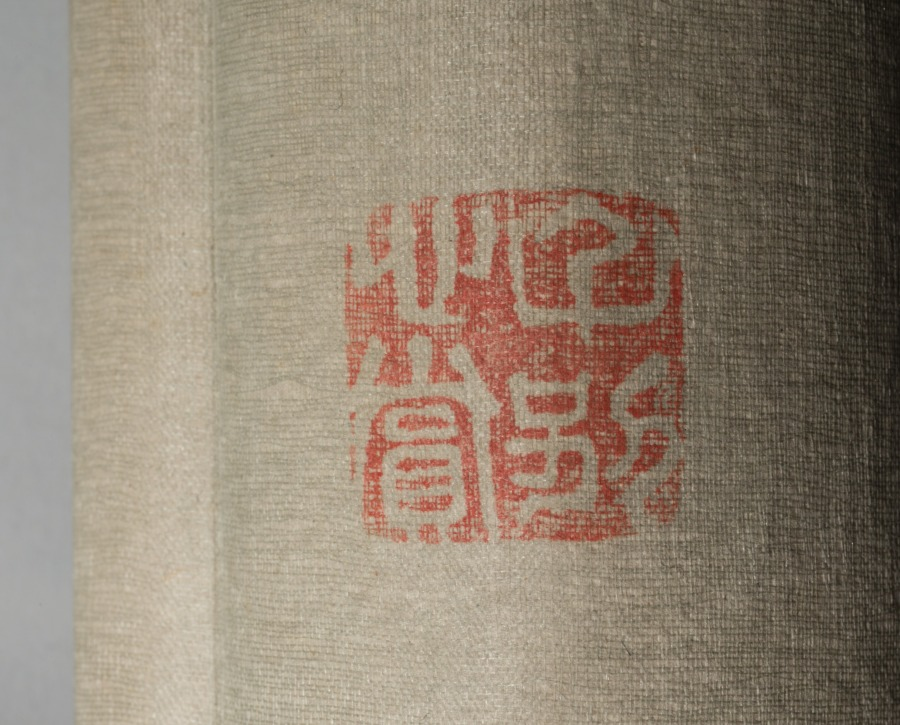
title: Courtesan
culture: Japan, Edo period (1615–1868)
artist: Matsuno Chikanobu (Japanese, active 1716–35)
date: 1716–35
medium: hanging scroll; ink and color on paper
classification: Painting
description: A glamorous courtesan sports an outer robe decorated with large roundels featuring plant motifs including iris and bush clover. Little is known about the life and artistic training of the painter Matsuno Chikanobu, an ukiyo-e artist who painted in a style strongly reminiscent of that of the Kaigetsudō studio. Many of his known paintings are on silk, and executed with high quality pigments, indicating that his primary clientele were wealthy individuals.